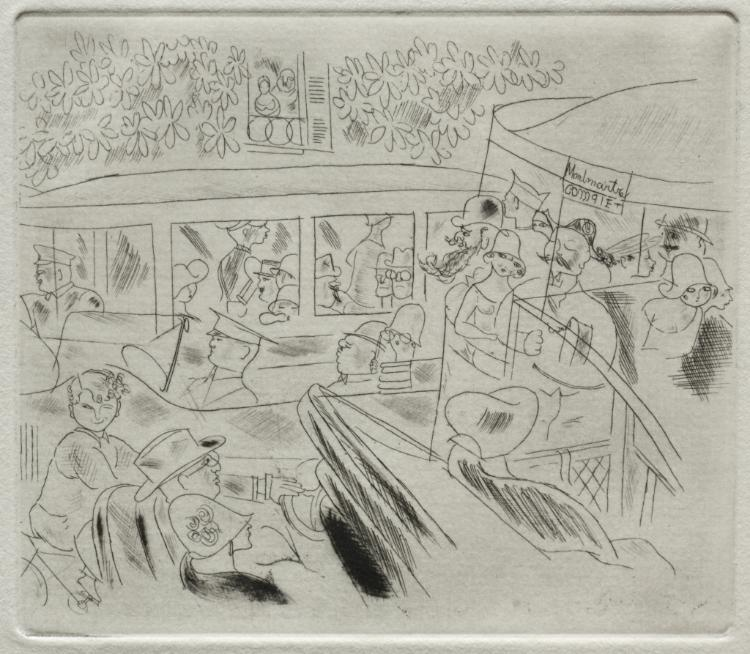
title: Traffic, Montmartre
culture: France, 20th century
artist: Charles Laborde (French, 1886–1941)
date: 1925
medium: etching and roulette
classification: Print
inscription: inscribed in graphite along bottom center of sheet: Charles Laborde